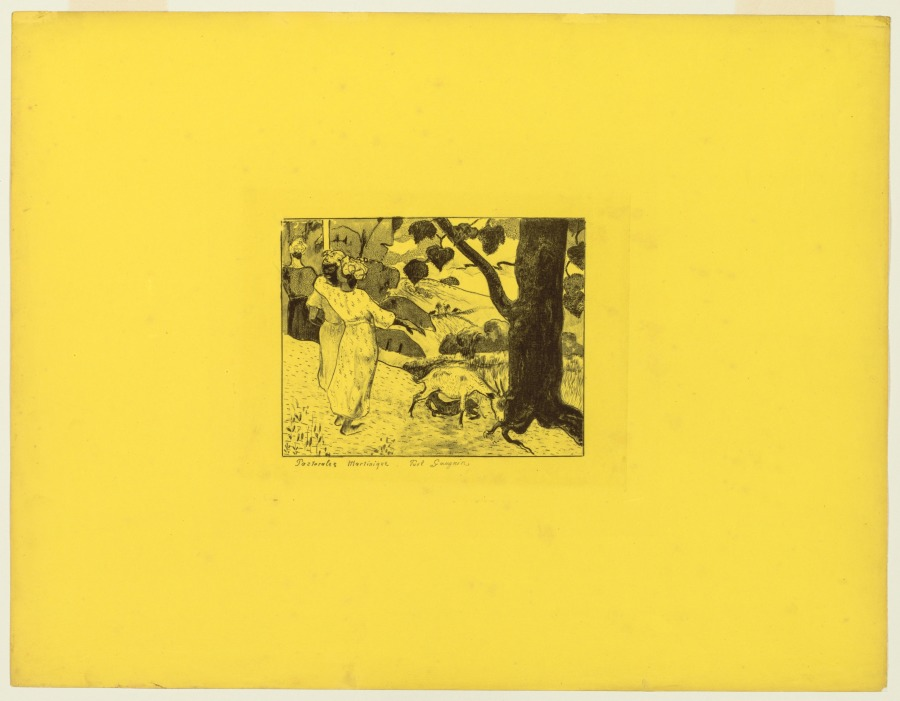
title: Volpini Suite: Martinique Pastoral (Pastorales Martinique)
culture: France, 19th century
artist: Paul Gauguin (French, 1848–1903)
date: 1889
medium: zincograph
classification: Print